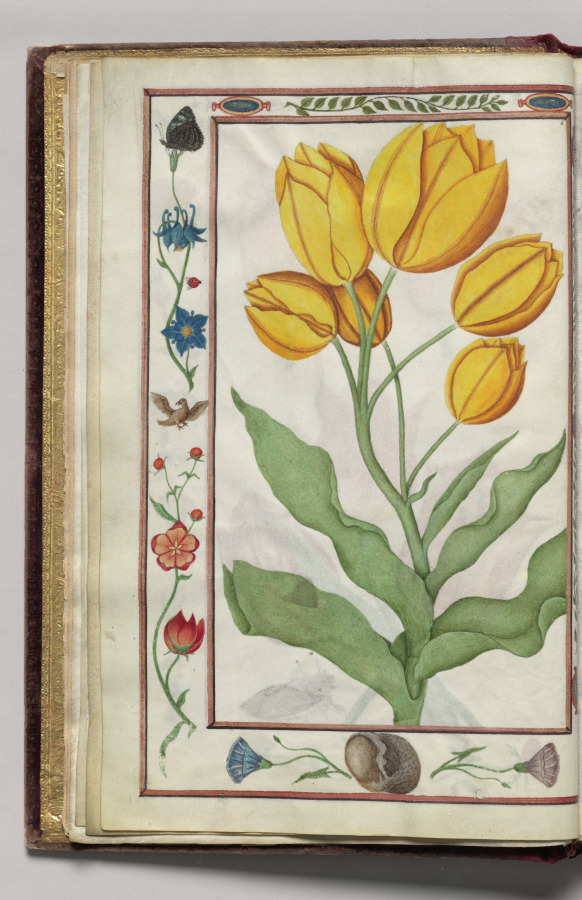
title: Yellow Tulips with Blue Columbine, Glory, Bird, and Butterfly Border, folio 3 (verso), from Florilegium (A Book of Flower Studies)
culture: France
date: 1608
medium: watercolor, ink, silver, and gold over occasional traces of pencil, on vellum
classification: Bound Volume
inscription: Dated: Poitiers 1608 (on frontispiece) Signed: On frontispiece in black ink, lower right: Van Kuyk Notation on drawing: Frontispiece: in pencil, lower margin: * élève de Van Kessel, peintre flammand (* in pencil also appears in front of Van Kuyk's name).